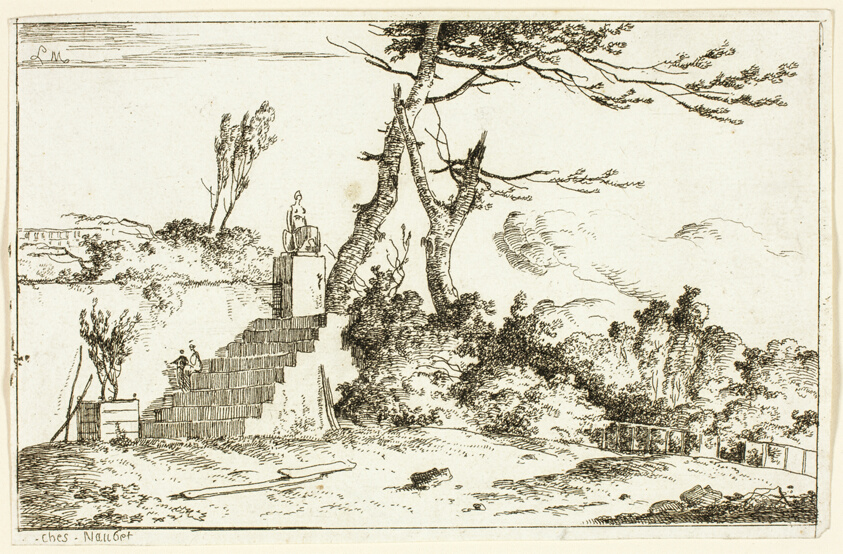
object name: Print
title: Landscape with Classical Statue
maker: Louis Gabriel Moreau (French, 1740-1806)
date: 1779/97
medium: Etching on paper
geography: France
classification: etching; print; prints and drawing